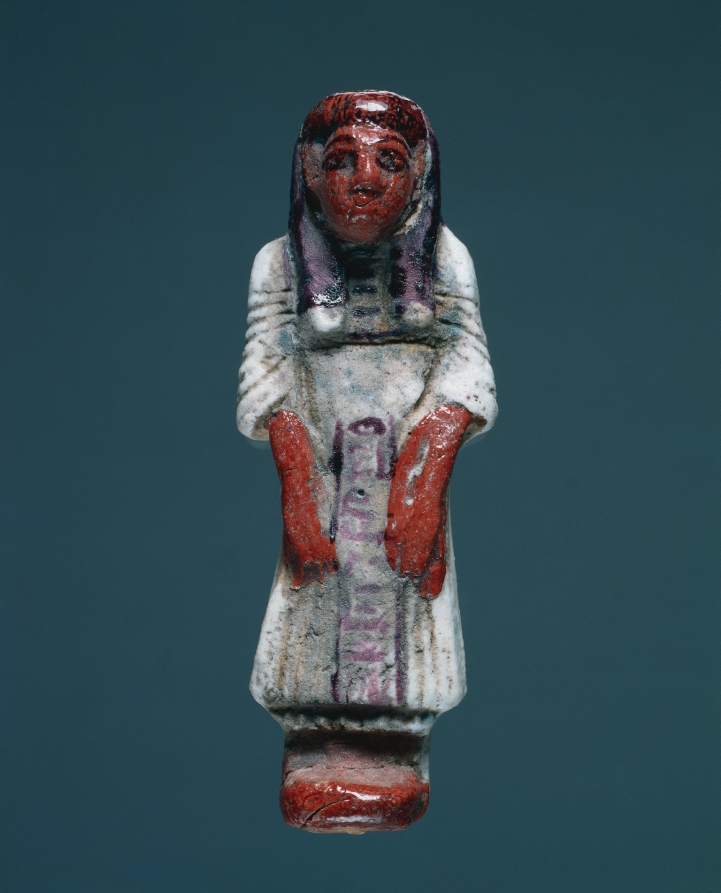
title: Shawabty in Dress of Everyday Life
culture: Egypt, New Kingdom (1540–1069 BCE), Dynasty 19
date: 1295–1188 BCE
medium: polychrome faience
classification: Funerary Equipment